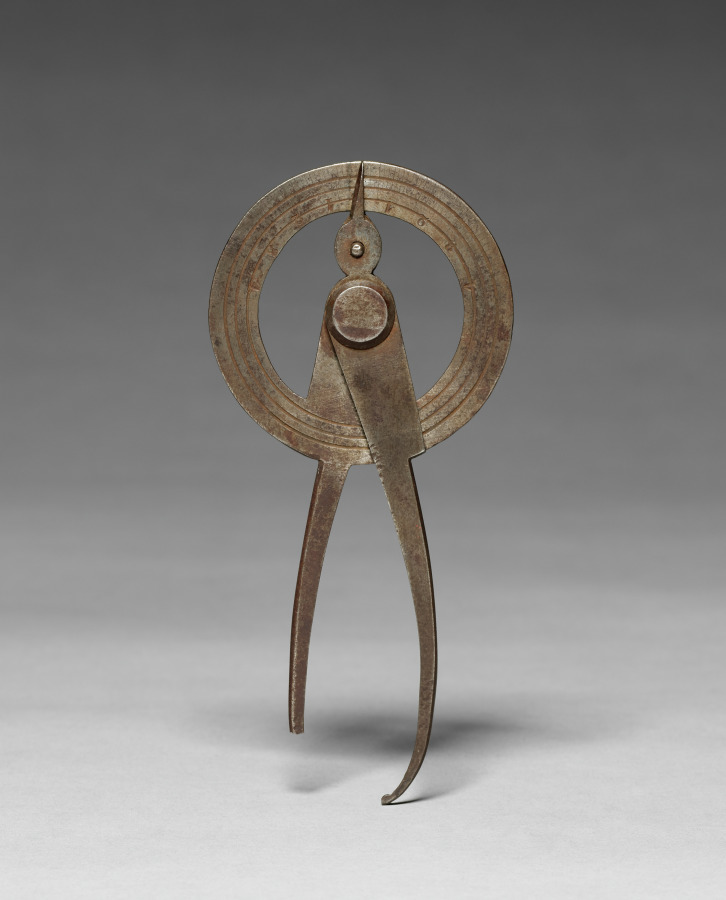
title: Inside and Outside Calipers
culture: Europe, 18th century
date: 1700s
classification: Tool